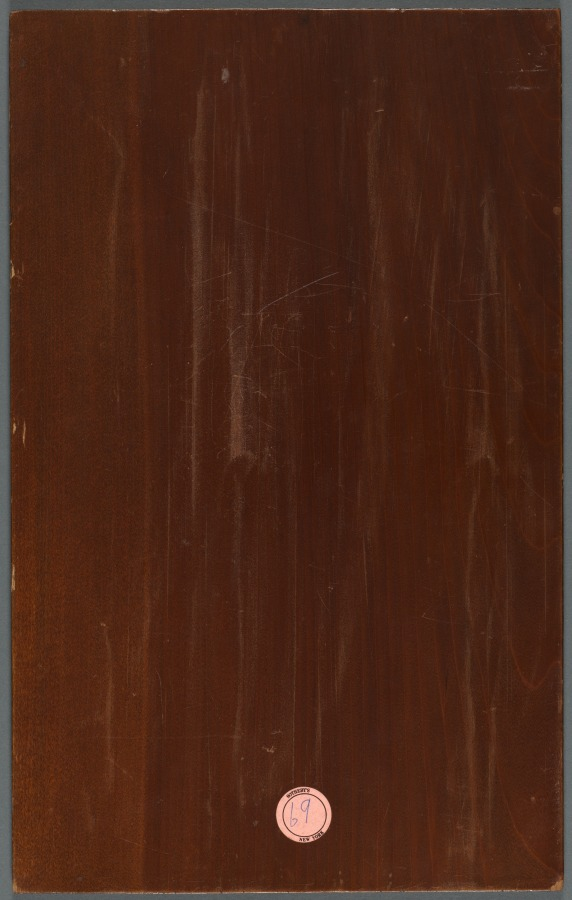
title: Album of Miscellaneous Subjects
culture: China, Qing dynasty (1644-1911)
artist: Min Zhen (Chinese, 1730–after 1788)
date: 1788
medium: Album of twelve leaves; ink on paper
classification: Painting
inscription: 予素有怪石之僻。余友戴笠山人嗜予畫，亦猶予之嗜怪石焉。向故訂約，以所好相易。值余奔馳遷延，今夏偶憶及怪石之在吾齋已五載。繪此以踐前言。誌以奇峭為十二冊之終。時戊申六月六日，正齋閔貞謹識。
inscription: Six seals appearing on the leaves: Min Zhen 閔貞; Zheng zhai 正齋; Qingqiao 青橋; Zhen 貞; Liao tang 蓼塘; Min Zhen zhi yin 閔貞之印。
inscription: 正齋傳世真跡，應推此冊為第一。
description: Min Zhen, who was orphaned at age 12 and developed an eccentric personality, was trained by Tang Yin (1682–1756), a writer, playwright, and superintendent of the imperial porcelain workshops in Jingdezhen. The connection to him may have enabled Min to stay in Beijing for a decade from around 1773. It is not clear whether he ever resided in Yangzhou, but his style is in many instances reminiscent of that of Yangzhou artist Huang Shen. This album demonstrates Min’s versatility and mature style in the last years of his life.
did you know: This album was painted for his friend Dailili Shanren in exchange for a scholar’s stone.